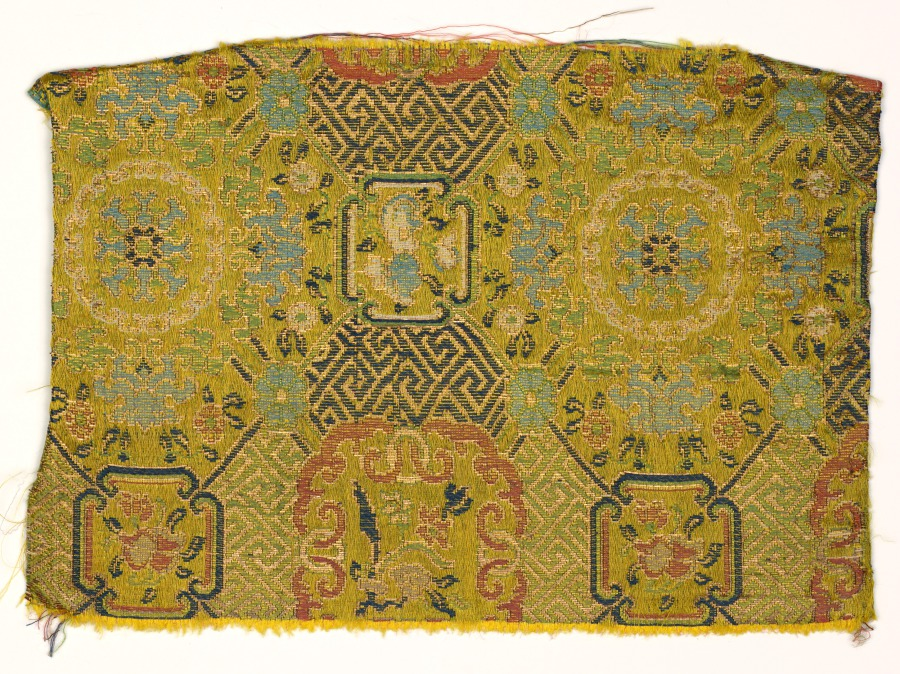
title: Textile Fragment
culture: Japan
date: 1800s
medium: silk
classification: Textile